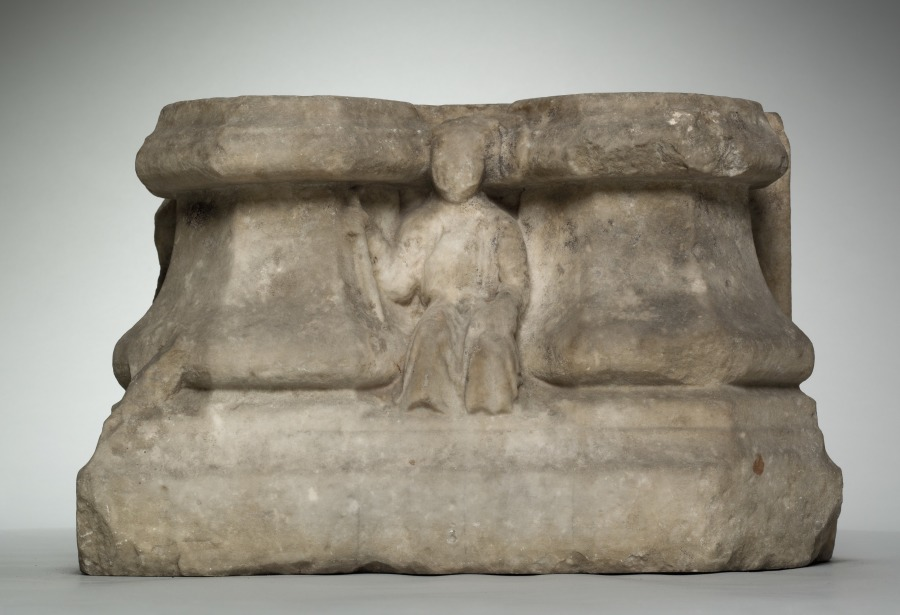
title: Double Column Base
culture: France, late 15th century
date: late 1400s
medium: marble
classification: Sculpture